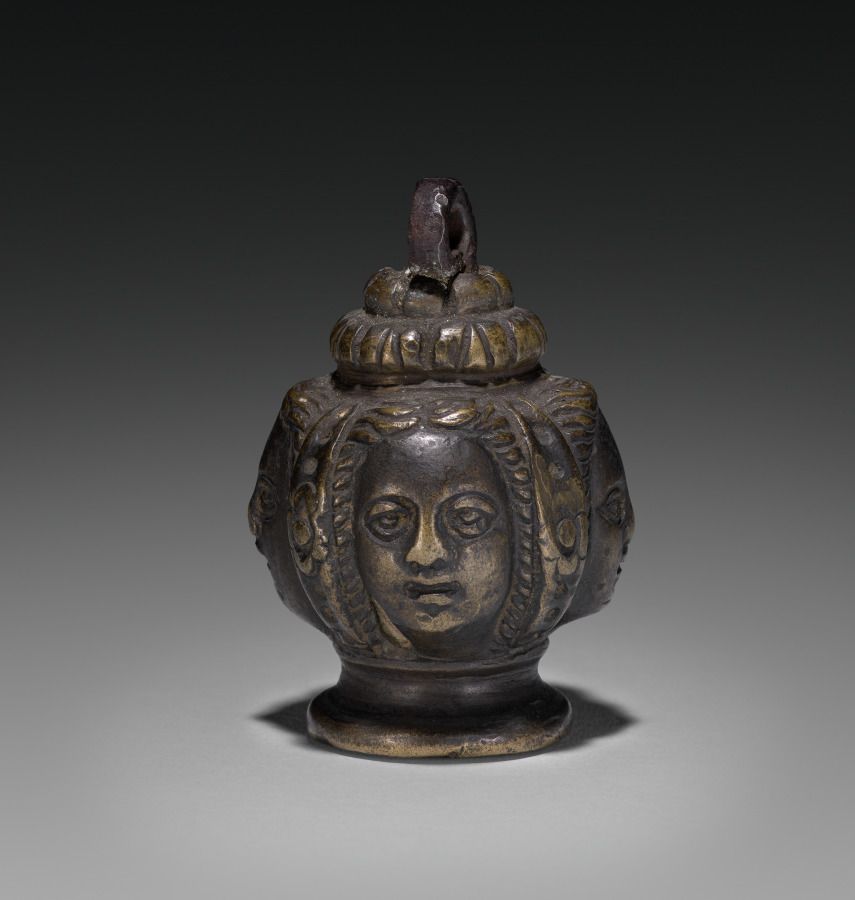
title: Decorative Finial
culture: Italian or French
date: 1800s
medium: brass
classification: Arms and Armor